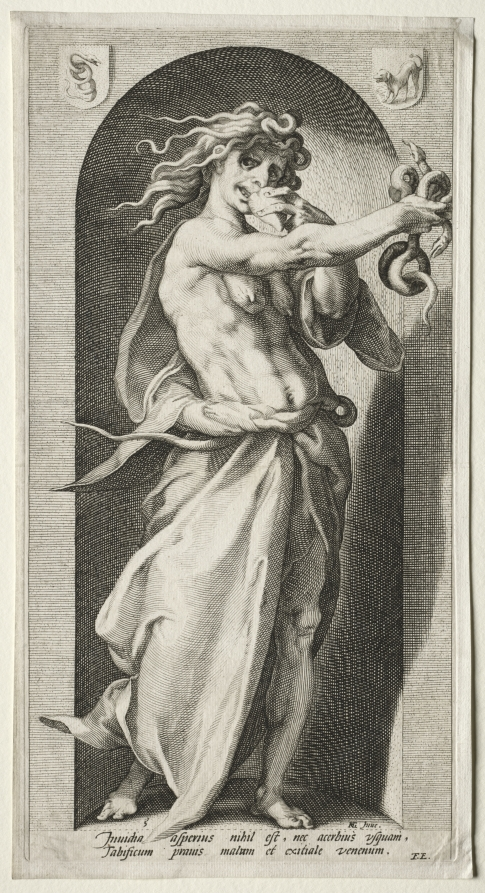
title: Envy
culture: Netherlands, 16th century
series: The Seven Vices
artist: Jacob Matham (Dutch, 1571–1631)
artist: after Hendrick Goltzius (Dutch, 1558–1617)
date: 1593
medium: engraving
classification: Print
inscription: lower left, in plate: 5 ; lower right, in plate: HG [in monogram] inve. ; across bottom, in plate: Invidia asperius nihil est, nec acerbius vsquani, / Tabificum pranis malum et exitiale venenum. F.E[stius].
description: In this print, which comes from a series of fourteen engravings, Envy is shown as an old hag eating a heart, a visual metaphor for the expression "eating your heart out" with resentment. Jacob Matham was Goltzius's stepson and pupil and entered his Haarlem workshop in 1581. A highly prolific engraver, Matham produced prints after artists including Michelangelo, Raphael, Abraham Bloemaert (1564–1651), and especially Goltzius. When Goltzius ceased his activities as a printmaker around 1600, Matham took over the workshop.